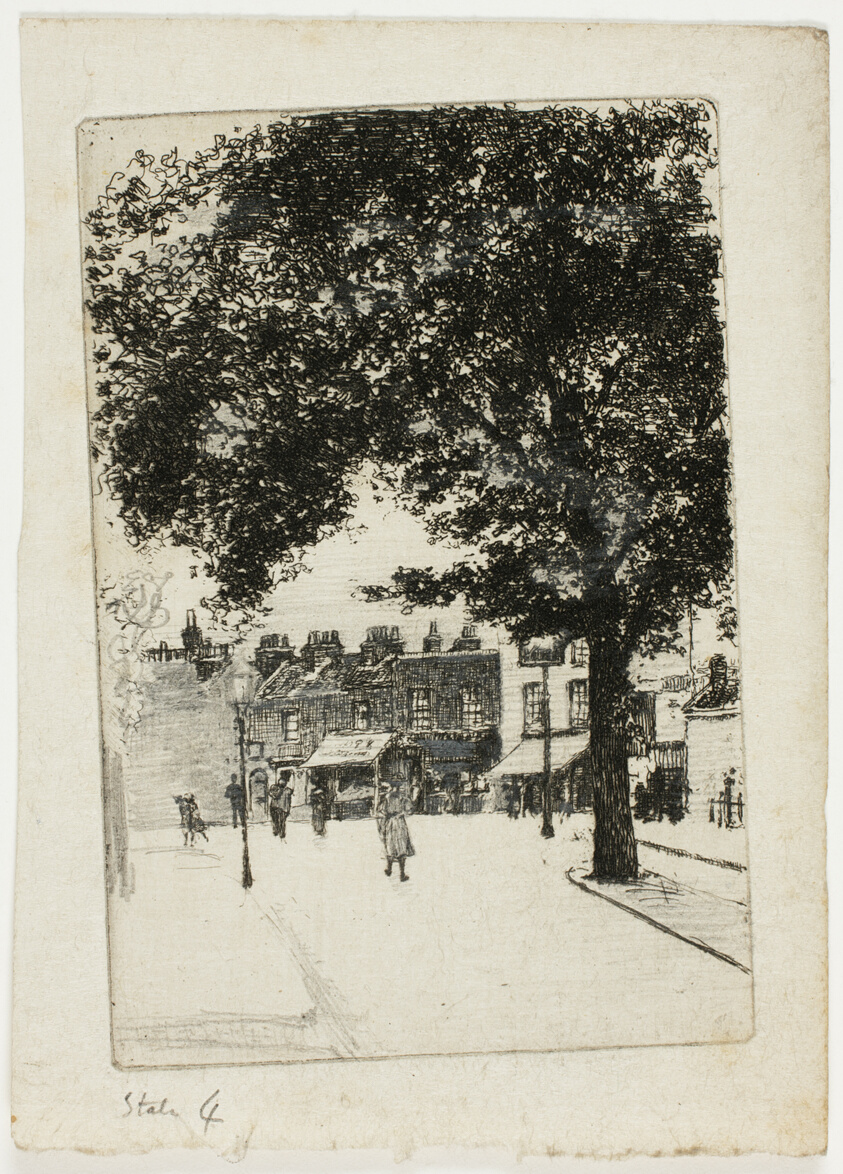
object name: Print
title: The Sign of White Horse, Parson's Green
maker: Theodore Roussel (French, worked in England, 1847-1926)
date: 1906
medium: Etching in black, with graphite, on cream Japanese paper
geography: England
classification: etching; paper; print; prints and drawing